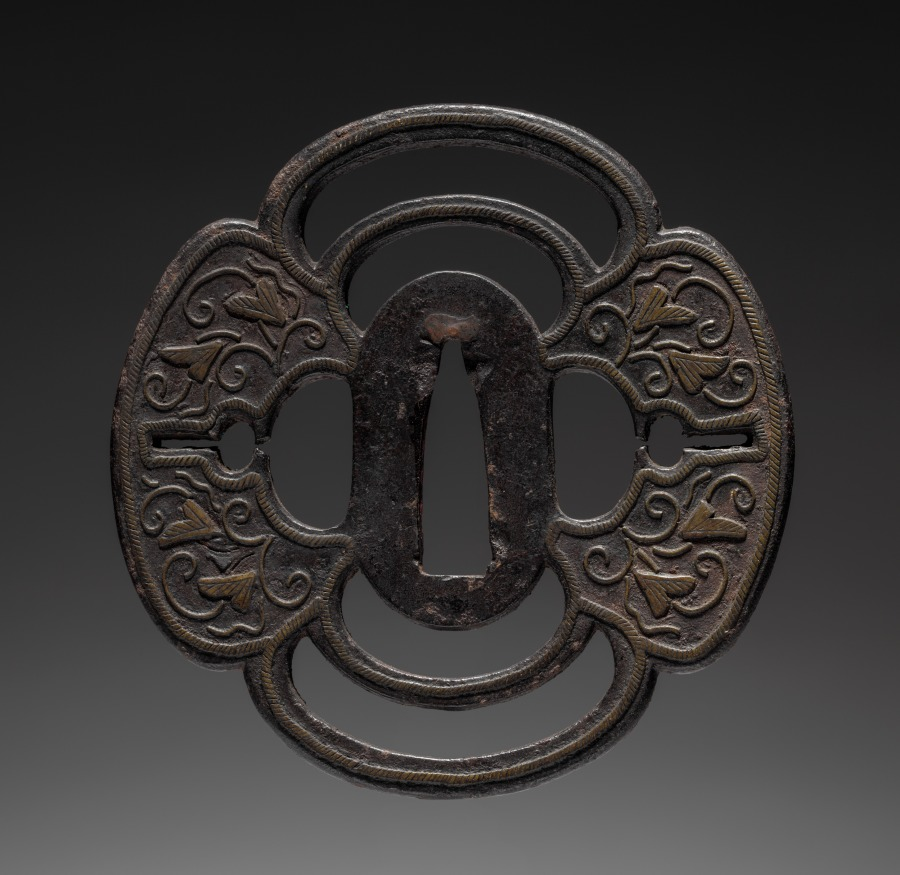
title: Sword Guard (Tsuba)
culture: Japan, possibly Edo period (1615-1868)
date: c. 1615–1868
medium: iron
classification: Arms and Armor